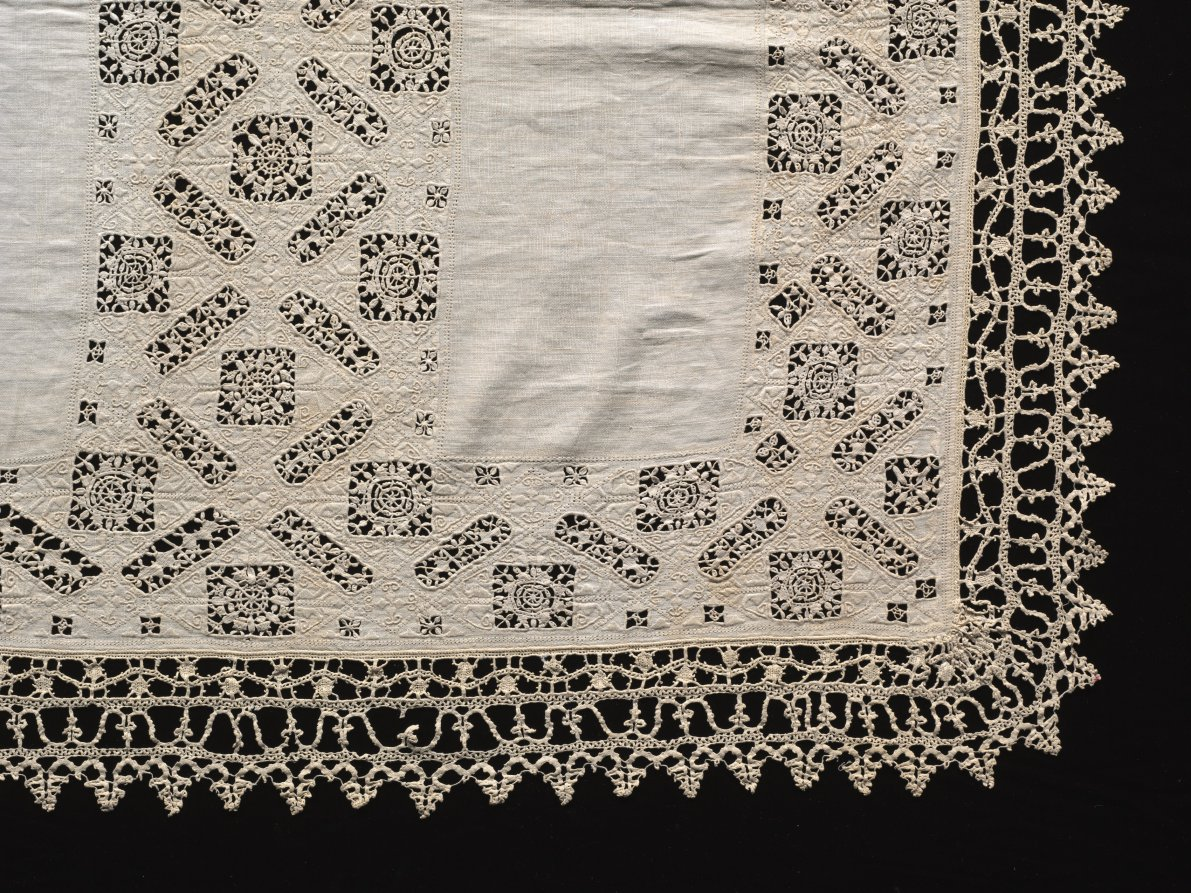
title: Lace Cloth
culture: Italy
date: 1500s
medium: Linen: needle lace (cutwork) and bobbin lace edging and embroidery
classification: Lace